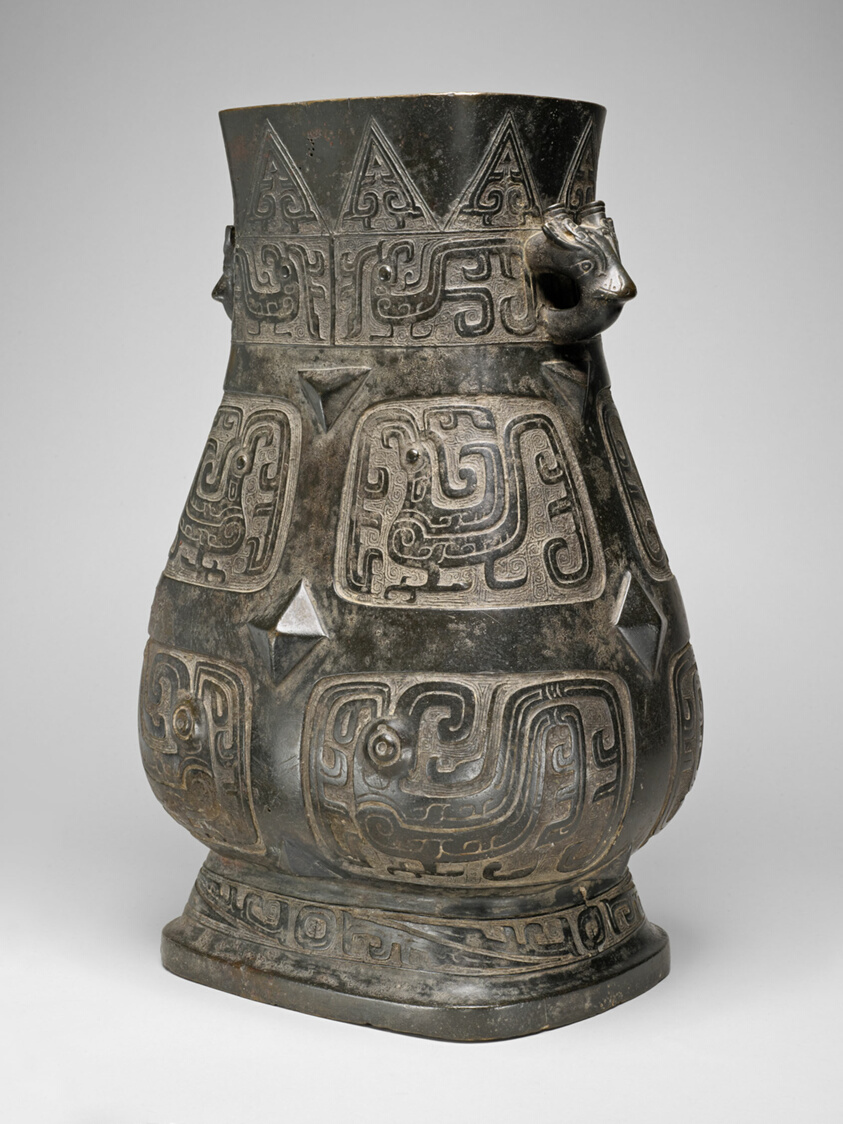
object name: Decorative Arts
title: Jar (hu)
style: Chinese (culture or style)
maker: China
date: Western Zhou dynasty, 927–850 B.C.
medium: Bronze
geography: China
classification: bronze; decorative arts